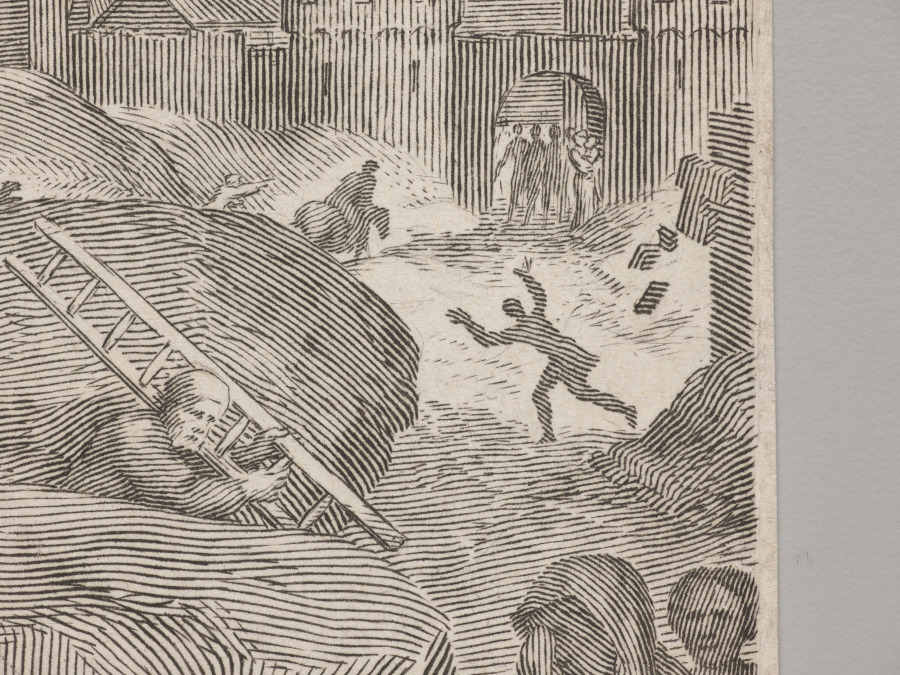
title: Christ Carried to the Tomb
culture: France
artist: Claude Mellan (French, 1598–1688)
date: 1678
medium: engraving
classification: Print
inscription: WATERMARK: bunch of grapes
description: The French engraver Claude Mellan spent time in Rome, where he developed a unique engraving style that uses simplified linear patterns and swelled lines to create optical, almost abstract effects. He created Christ Carried to the Tomb later in his career, when he had fully developed his linear approach to engraving, using swelled lines alone, without the use of crosshatching. The subject of Christ’s burial procession was somewhat unusual among works of the period, and Mellan went further to highlight a lesser-known passage from the biblical book of Matthew in the foreground that describes the resurrection of saints after Christ’s death on the cross. This rather obscure subject matter aligned with Mellan’s emphasis, throughout his career, on presenting engravings that offered something unique and extraordinary to his audience of collectors.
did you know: The foreground figure was portrayed using swelled lines that terminate at the edge of the form, creating the optical illusion of contour lines.